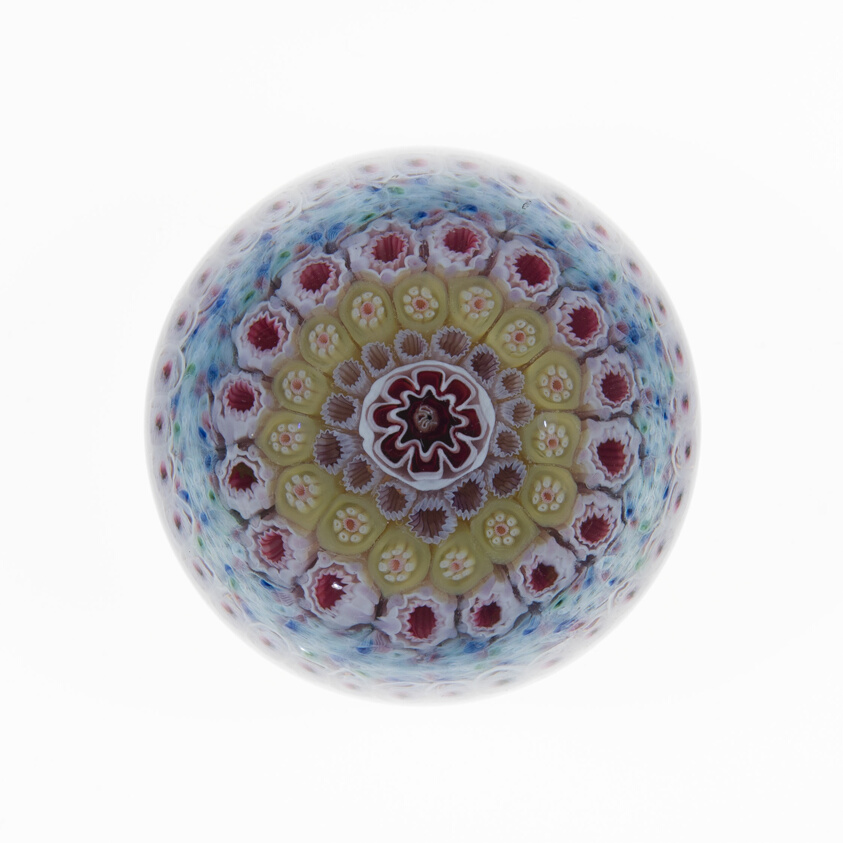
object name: Glass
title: Paperweight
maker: George Bacchus and Sons; Birmingham, England, c. 1817-1882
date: Late 19th century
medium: Glass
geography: England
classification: paperweight; glass